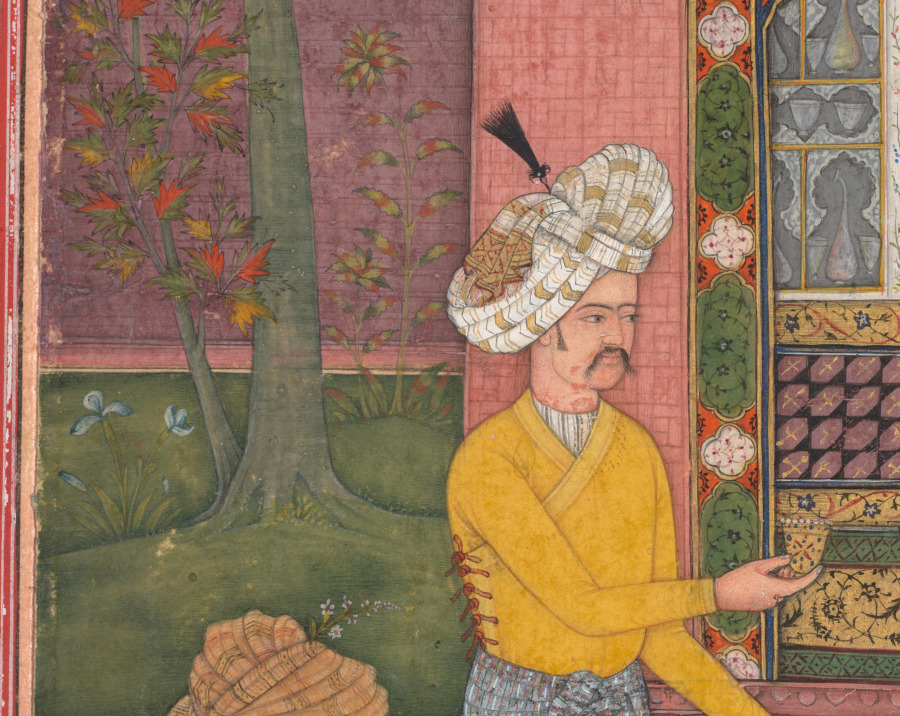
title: A Royal Picnic on a Terrace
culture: Mughal India, court of Akbar (reigned 1556–1605)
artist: attributed to Muhammad Ali (Persian, active 1590–1620)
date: c. 1620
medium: Gum tempera and gold on paper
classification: Painting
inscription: later Hindi inscription on reverse: Babur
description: A richly patterned carpet spans the width of the composition and forms the setting for a royal visit. The status of the highest-ranking person is indicated by the tan cloth placed over the carpet and the voluminous wine-colored cushion ornamented with stylized gold clouds. An attendant holding an emblem of Indian royalty, the fly whisk, stands to one side. At the far right of the carpet are two books, indicating that they are learned men. Like the carpet, the book covers have central medallions and borders, in line with the Persian aesthetic that the Mughals of India held in high regard.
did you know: A gentleman connoisseur has tucked a flowering sprig into his voluminous turban.